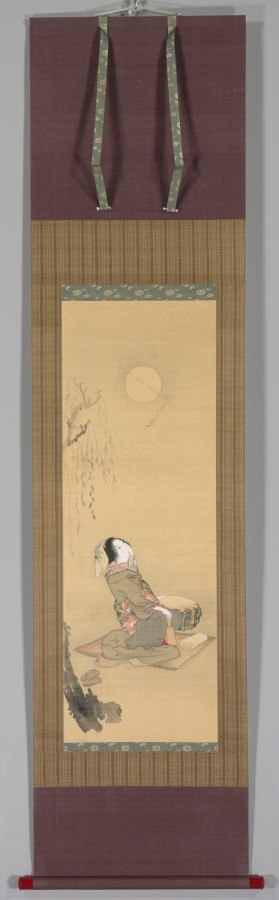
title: Woman Looking at the Moon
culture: Japan, Edo period (1615–1868)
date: 1800s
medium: hanging scroll; ink and color on silk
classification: Painting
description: In this scene, a woman pauses in her task of fulling cloth (pleating or gathering cloth to make it full) to gaze at the moon just as a flock of geese pass over. Perhaps overcome by the moment, she bites the end of her kerchief. The simple elements of fulling blocks, geese, and a full moon are traditional symbols of autumn in Japanese art. The pounding of the silk also has erotic connotations in East Asian painting. Although it is not signed, the style resembles work by painter Teisai Hokuba, known for his ukiyo-e or “pictures of the floating world.” Hokuba was an eminent disciple of the famed artist Katsushika Hokusai (1760–1849). The woman's white face appears to reflect the moon's surface. In Japan, the autumn harvest moon has many romantic associations and is a popular subject of poetry. In mid-autumn a Moon-Viewing Festival is held on the fifteenth night of the eighth lunar moon, which is regarded as the Harvest Moon. This festival became popular during the Edo period, when the citizens of the city of Edo enjoyed a festival in honor of the moon held on the banks of the Sumida River.